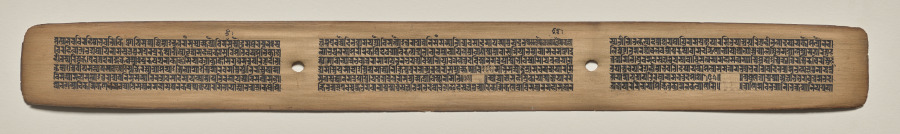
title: Text, Folio 103 (recto), from a Manuscript of the Perfection of Wisdom in Eight Thousand Lines (Ashtasahasrika Prajnaparamita-sutra)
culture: Eastern India, Bihar, Vikramashila Monastery. Painting: Nepal, Kathmandu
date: Sunday, September 14, 1119 (year 239 of the Newar Samvat in the month of Ashvina)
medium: gum tempera and ink on palm leaves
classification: Painting